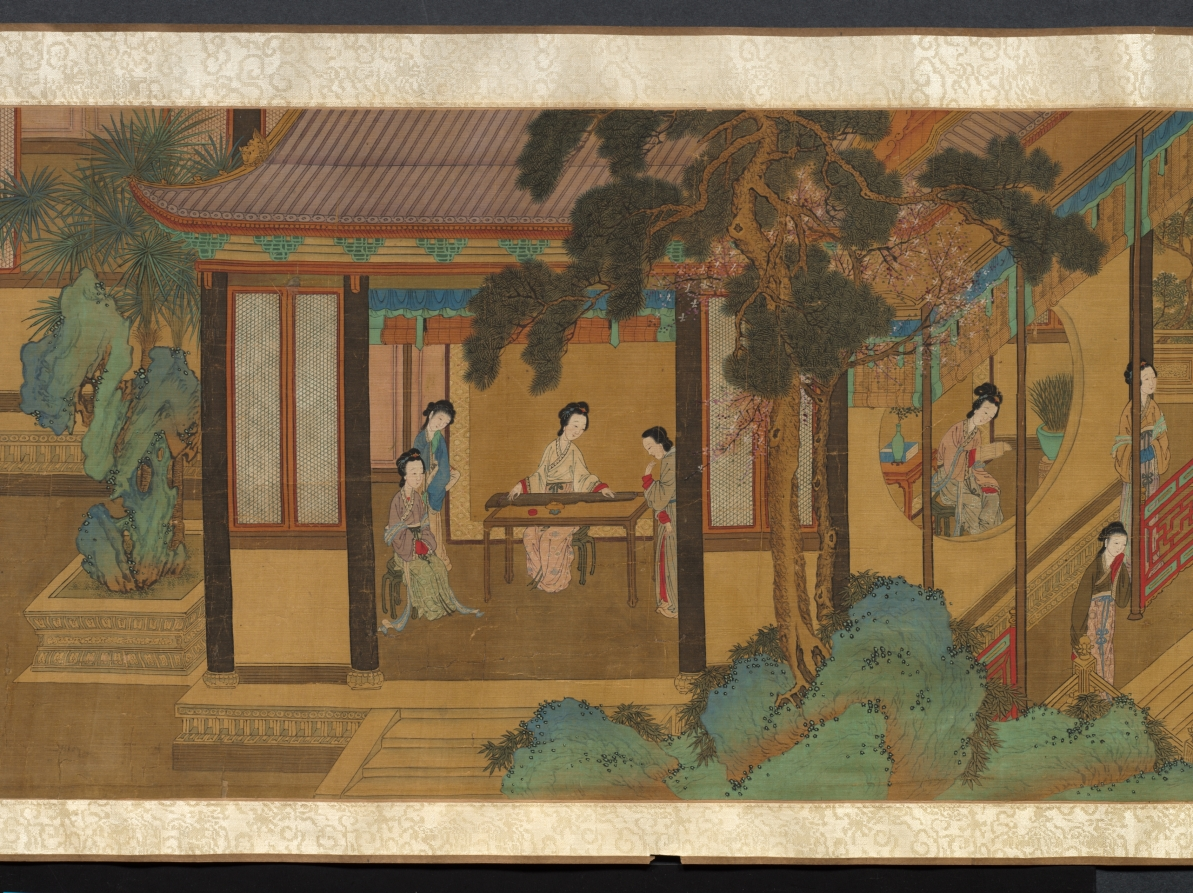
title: Palace Ladies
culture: China, Qing dynasty (1644-1911)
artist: copy after Qiu Ying (Chinese, 1494–1552)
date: 1644–1911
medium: handscroll, ink and color on silk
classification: Painting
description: This handscroll illustrates the pursuits of court ladies in a palace precinct on a spring day. Women, young girls, and their maids amuse themselves by sitting on a swing, playing games, watering and admiring peonies, performing music together, playing the qin (zither), feeding a parrot on the balustrade and fish in the water, or catching butterflies. The life of elite women was mostly restricted to the so-called inner quarters, meaning the garden and inner courts of the house. This painting idealizes the world of young palace girls that in fact was often filled with boredom and waiting for a lover.